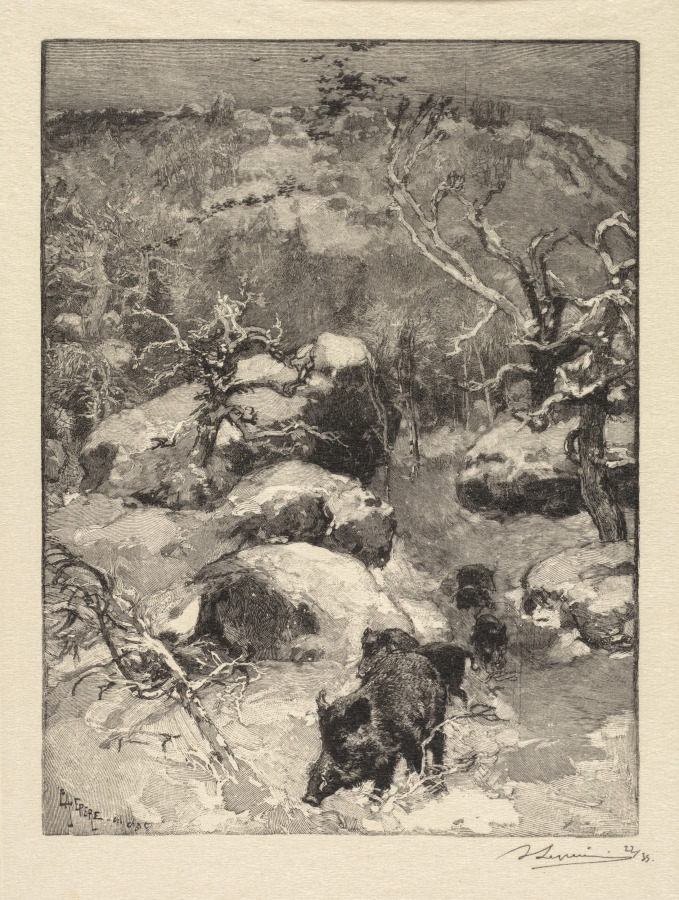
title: Fontainebleau Forest: Cuvier-Châtillon Cliff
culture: France, 19th century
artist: Auguste Louis Lepère (French, 1849–1918)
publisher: A. Desmoulins, Published in Revue Illustrée, 1887–90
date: 1890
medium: wood engraving from bound volume of 34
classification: Bound Volume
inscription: Below image, lower right, in black ink: ALepère 22/35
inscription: in block, lower left: A. LEPERE del. et sc.on window mat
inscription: lower right, in graphite: Roche Cuvier Châtillon